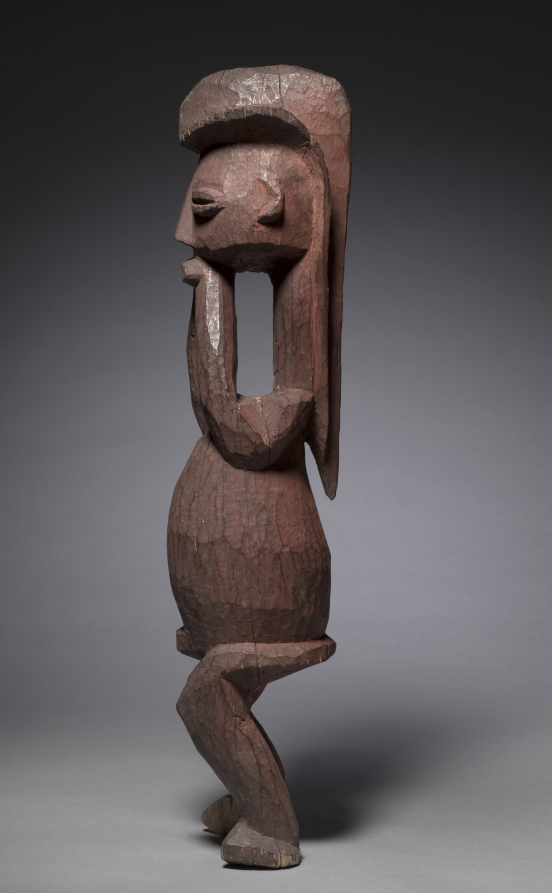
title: Male Figure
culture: Africa, Central Africa, Democratic Republic of Congo, Hungaan-style maker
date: mid- to late 1800s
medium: Wood and colorant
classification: Sculpture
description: Hungaan figures of this size served as guardians of ritual shrines and functioned in rituals to promote fertility, guarantee well-being, and ensure longevity. The striking crested hairstyle imitates a real coiffure or a wig, indicative of status and prestige. The hands supporting the chin identify the figure as a chief who is immersed in thought and contemplation, pondering over his responsibilities.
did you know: The red powdery surface of this figure mimics a red body adornment that mixed ground camwood with palm oil.